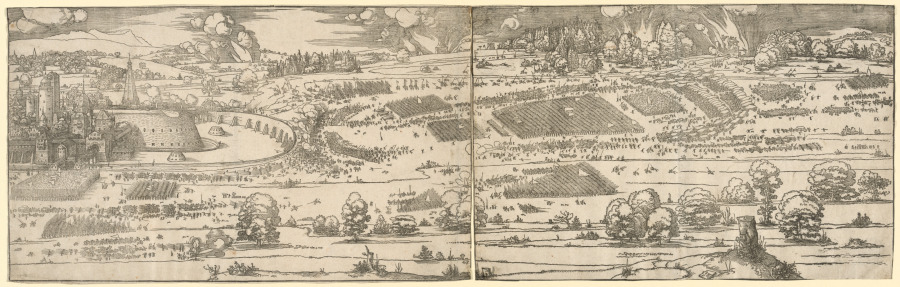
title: Siege of a Fortress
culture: Germany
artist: Albrecht Dürer (German, 1471–1528)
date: 1527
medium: woodcut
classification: Print